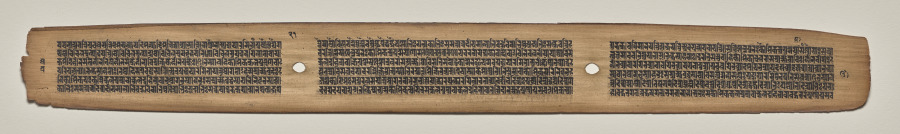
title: Text, Folio 21 (verso), from a Manuscript of the Perfection of Wisdom in Eight Thousand Lines (Ashtasahasrika Prajnaparamita-sutra)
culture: Eastern India, Bihar, Vikramashila Monastery. Painting: Nepal, Kathmandu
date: Sunday, September 14, 1119 (year 239 of the Newar Samvat in the month of Ashvina)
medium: gum tempera and ink on palm leaves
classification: Painting